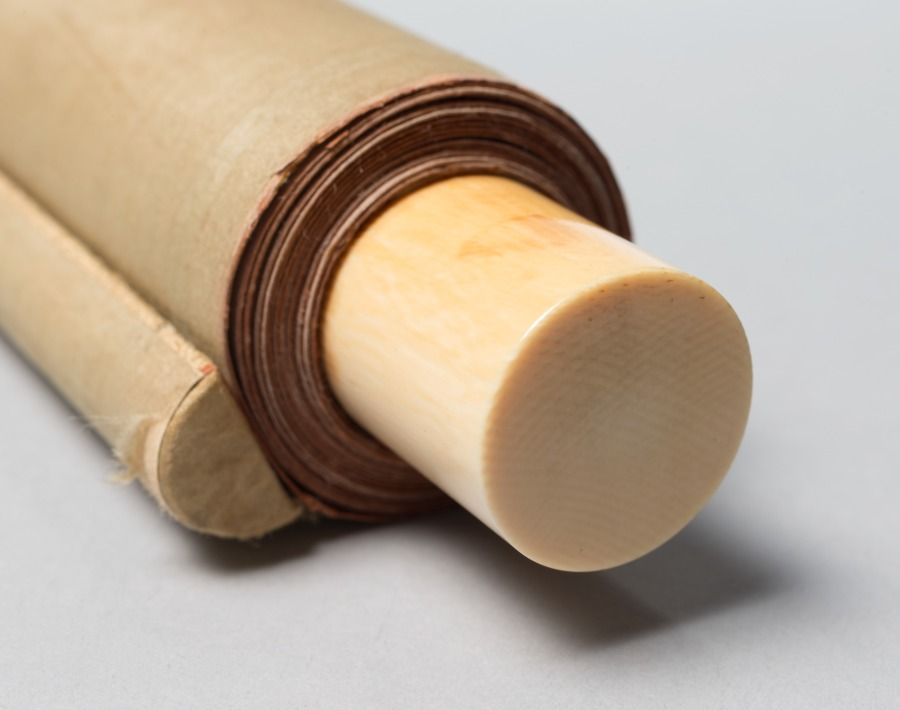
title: The Crossing of the Yangzi River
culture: China, Qing dynasty (1644-1911)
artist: Shang Rui (Chinese, 1634?-)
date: c. 1700–1720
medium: hanging scroll, ink and slight color on paper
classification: Painting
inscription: Colophons: One upper left inscription by the artist followed by two seals; one upper right inscription followed by two seals; three other seals, one in lower left